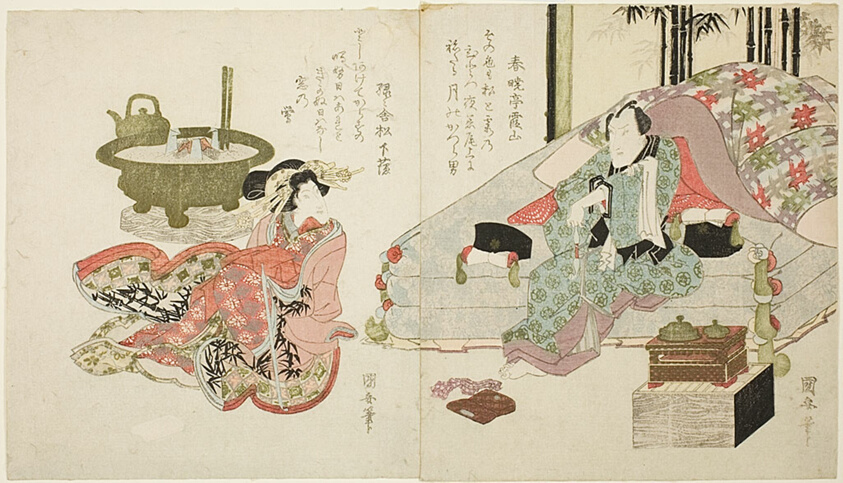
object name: Print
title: A Couple in the Bedroom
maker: Utagawa Kuniyasu (Japanese, 1794-1832)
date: early 19th century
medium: Color woodblock print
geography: Japan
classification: woodblock print; print; asian art